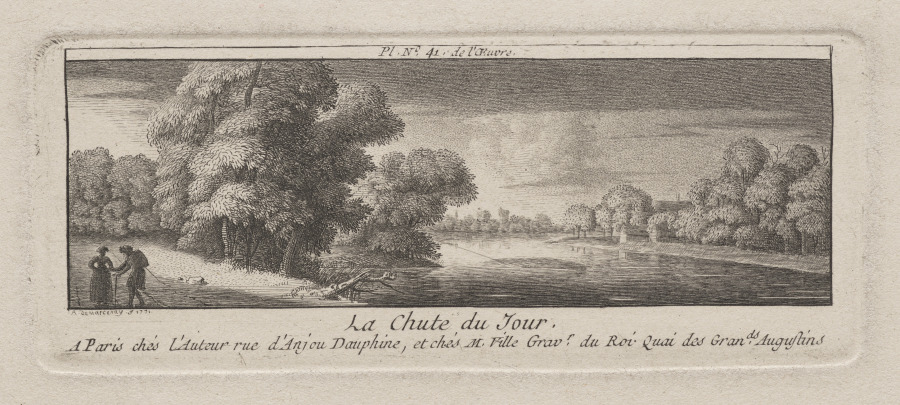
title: The Close of the Day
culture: France, 18th century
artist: Antoine de Marcenay de Ghuy (French, 1724–1811)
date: c. 1771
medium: etching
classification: Print